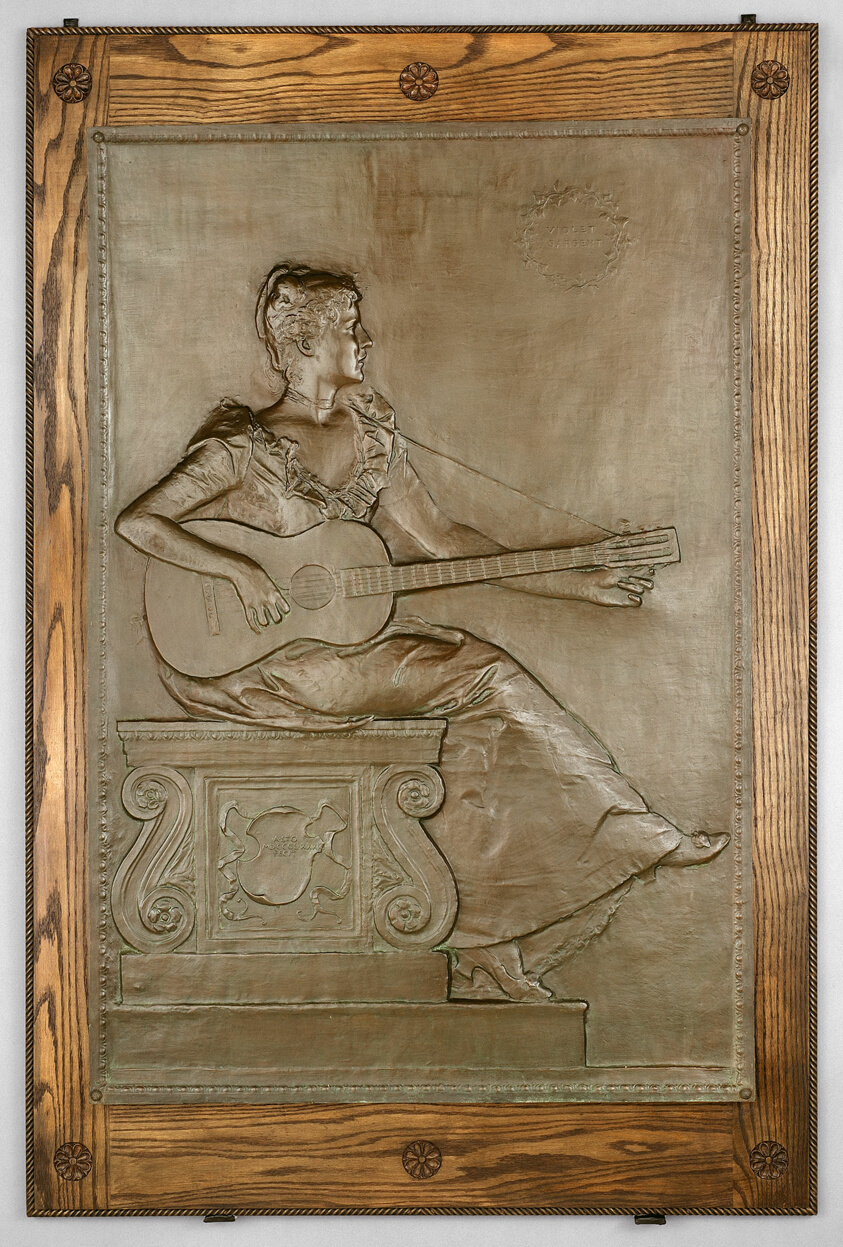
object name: Sculpture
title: Violet Sargent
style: Realism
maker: Augustus Saint-Gaudens (American, born Ireland, 1848–1907)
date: Modeled 1890, cast c. 1908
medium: Bronze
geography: New Hampshire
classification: sculpture; american arts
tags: people, portraits